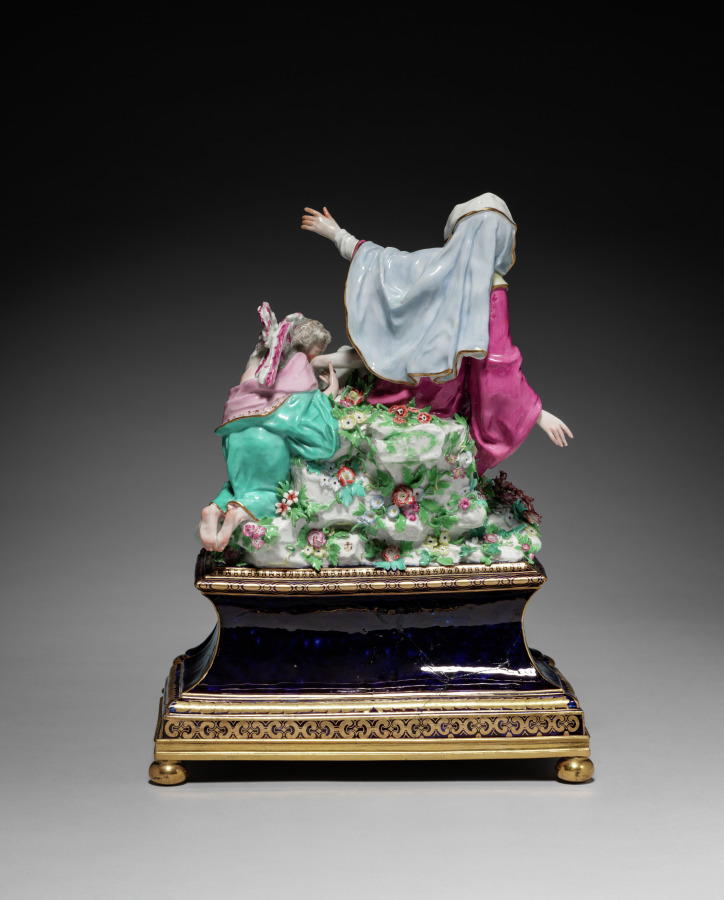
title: Figure of the Pietà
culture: England, London, Chelsea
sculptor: Joseph Willems (Flemish, 1715–1766)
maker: Chelsea Porcelain Factory (Britain, London, 1745–84)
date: c. 1761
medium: Soft-paste porcelain, painted in enamels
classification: Ceramic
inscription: Painted in gilt over the glaze at base of figure on the reverse: [a gold anchor]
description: The distinctively Roman Catholic subject of Mary cradling her son, the crucified Christ, suggests this figure was probably made for one of the aristocratic English families forced to practice their Catholicism in secret during the mid-1700s. Because of the laws banning Catholic worship in England, grand houses were often modified to include private chapels or rooms in private quarters where visiting priests delivered the sacraments in defiance of the laws favoring Protestant worship. A figure of this size and type likely would have served as an important devotional focal point within that context.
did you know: Only three examples of this figure by the Chelsea Porcelain Factory are known to exist.